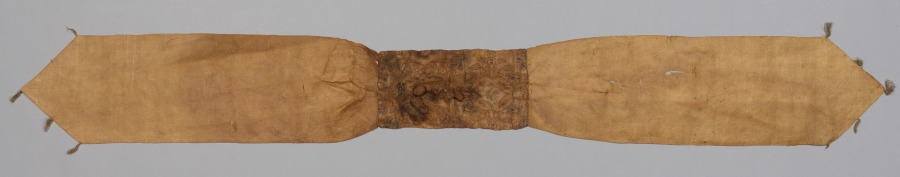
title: Silk Belt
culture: China, Liao dynasty (907-1125)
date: 907–1125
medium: compound twill weave, silk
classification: Textile